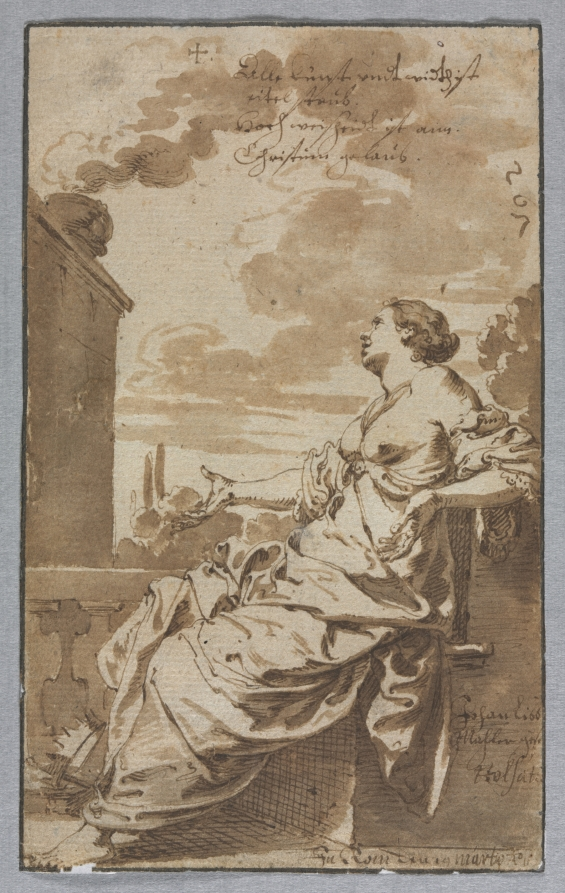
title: Allegory of Christian Belief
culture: Germany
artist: Johann Liss (German, c. 1597–1631)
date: c. 1622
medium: pen and brown ink and brush and brown wash; framing lines in pen and black ink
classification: Drawing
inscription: signed, lower right, in brown ink: Johan Liss / Mahler [illegible] / Holsati[a][masked] ; by artist, upper right, in brown ink: Alle Kunst undt widtz ist / eitel staub. / Hoch weisheidt ist ann. / Christum gelaub. ; by artist, lower right, in brown ink: Zu Rom den 19 martis Ao ["o" in superscript] 16[illegible, final two numbers abraded] ; upper left, in brown ink: + [collector's mark?]; upper right, along right edge, in brown ink: 265 [sideways] ; VERSO, upper left, in ink: 572 ; upper right, in graphite: 69 [sideways] ; center, in graphite: No. 99 al ; lower right, in graphite: Joh. Liss. [erased] ; lower left, in graphite: mj [?] ; lower left, in graphite: T5910 ; lower left, in graphite: Jah. Lys 1570-1626 ; lower right, in graphite(?): Bo. 20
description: This exceedingly rare drawing is one of only two signed sheets by Liss, who, in spite of the brevity of his career, was one of the most important German-born painters of the 17th century. Here, faith is personified as a woman with bared breasts and bare feet, symbolic of true Christian belief: plain, pure, and without artifice. She has cast aside worldly things-a crown, scepter, and book-and gazes heavenward as smoke wafts from an urn. The long inscription indicates that the sheet is from an album amicorum, or friendship book, in which drawings, poems, and autographs were collected as souvenirs of acquaintanceships. Liss may have made the drawing to dazzle an influential recipient with his inventive interpretation of a traditional religious subject.